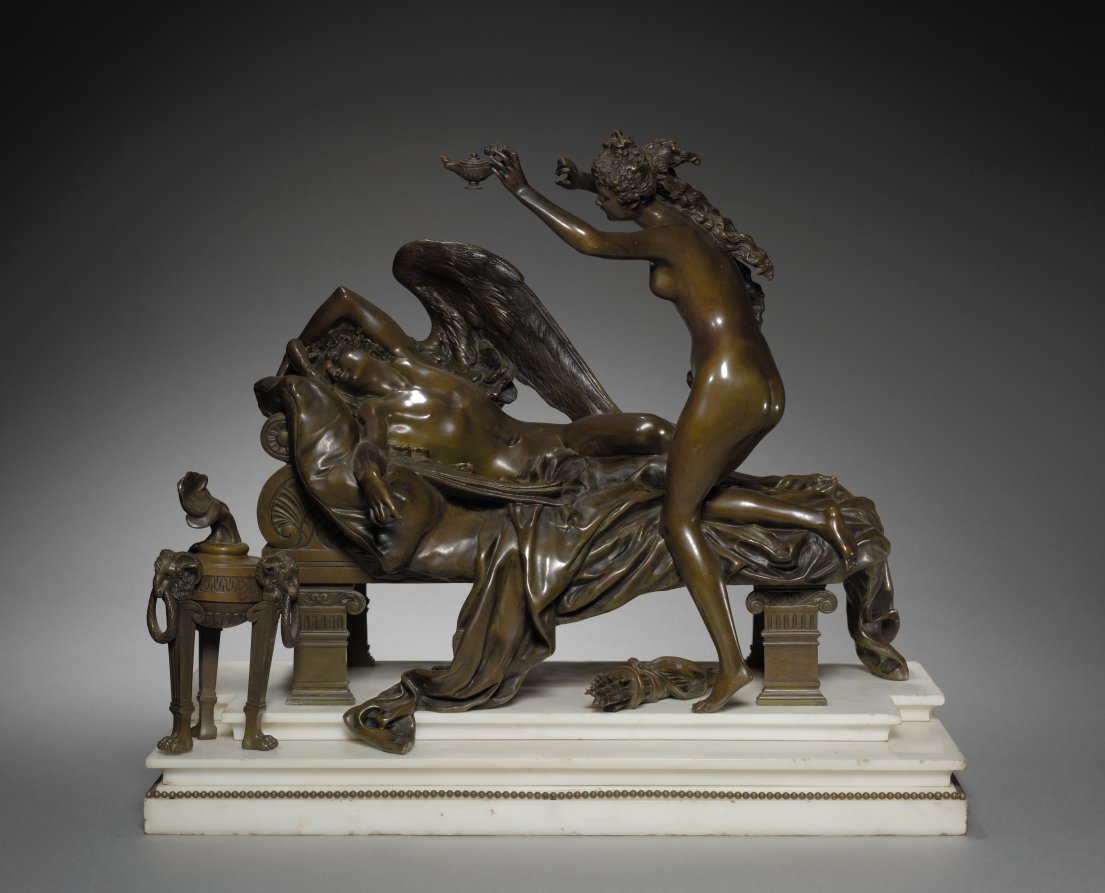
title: Cupid and Psyche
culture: France, 19th century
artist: Albert-Ernest Carrier-Belleuse (French, 1824–1887)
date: c. 1870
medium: bronze with marble base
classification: Sculpture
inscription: signed in ligature on edge of couch at head: "Carrier Belleuse."